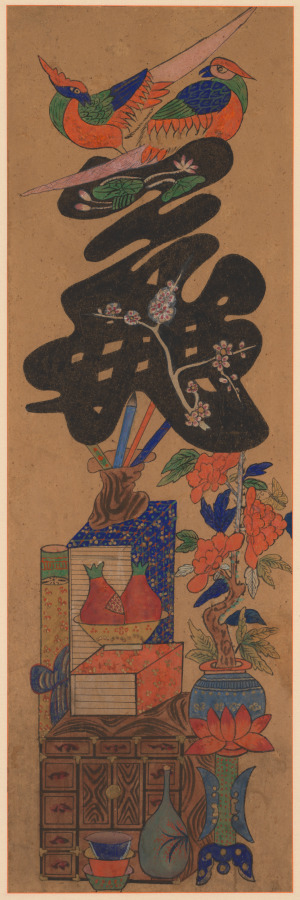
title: Munja-Chaekgeori Screen (Character-Books Screen)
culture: Korea, Joseon dynasty (1392–1910)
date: early 1900s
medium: Eight-panel folding screen, ink on paper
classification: Painting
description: This folding screen is a whimsical harmony of two different subjects: chaekgeori, or books and things; and munja, or characters. The lower section of each panel depicts the imagery of things, including books, decorative arts, and utilitarian objects. The upper portion of each panel bears a classical Chinese character. Read from far right to left, the eight characters refer to the values of Confucian teachings of the Joseon dynasty: filial piety, brotherly love, loyalty, trust, propriety, righteousness, modesty, and humility. While these two pictorial genres are harmoniously conjoined on the same picture plane, two sharply contrasting world views—urban consumerism and traditional Confucian ethics that despise materialism—compete with one another.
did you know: The eight Korean characters each mean filial piety, brotherly love, loyalty, trust, propriety, righteousness or justice, modesty or integrity, and humility or the feeling of shame.